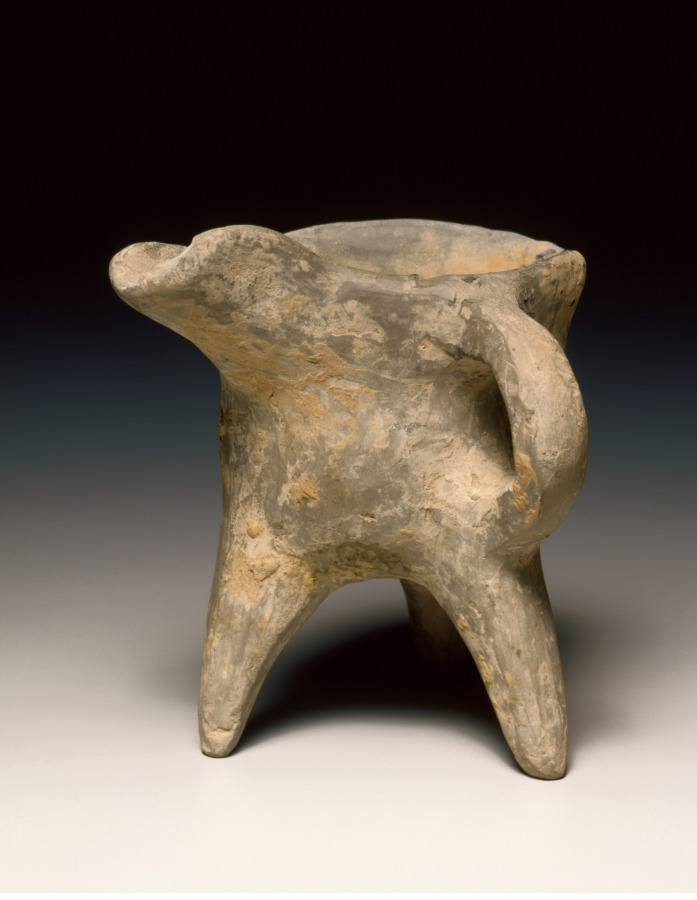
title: Wine Warmer (Jue)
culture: China, Shang dynasty (c. 1600–c. 1046 BCE), Anyang phase (c. 1250–1046 BCE)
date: c. 1300–1023 BCE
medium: pottery, tripod vessel with loop handle and rudimentary bowstring decoration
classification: Ceramic